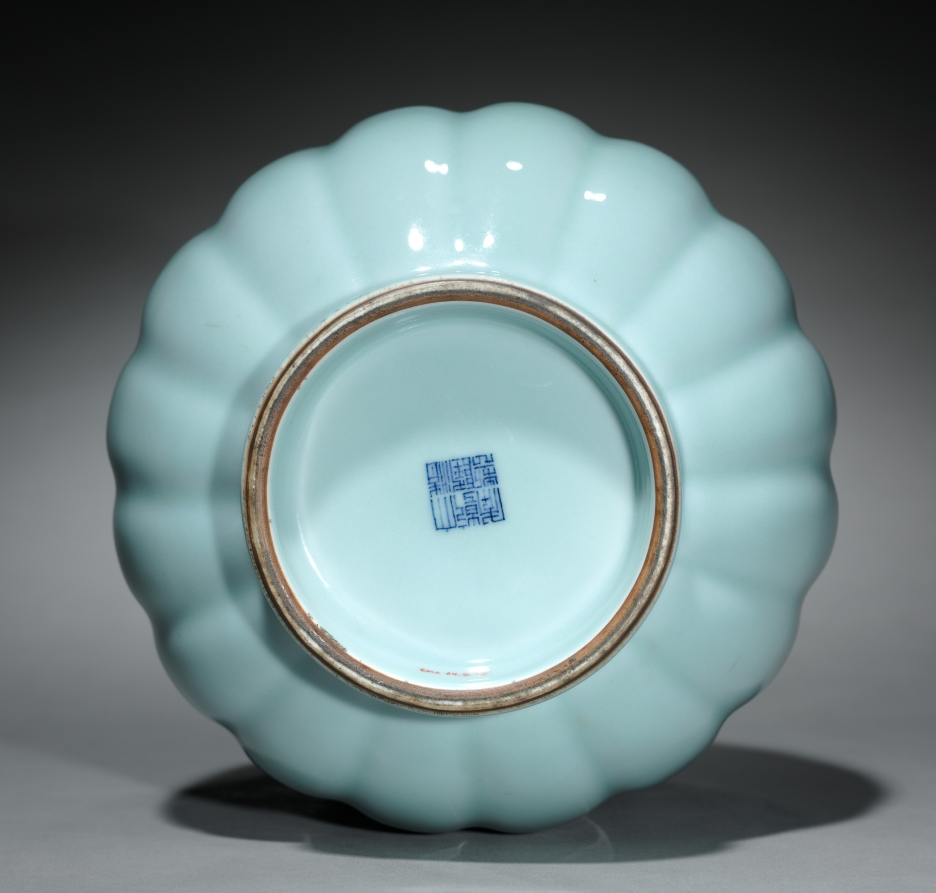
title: Melon-Shaped Fluted Vase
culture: China, Jiangxi province, Jingdezhen kilns, Qing dynasty (1644-1911), Qianlong mark and reign (1736-95)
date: 1736–95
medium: porcelain with clair-de-lune glaze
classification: Ceramic